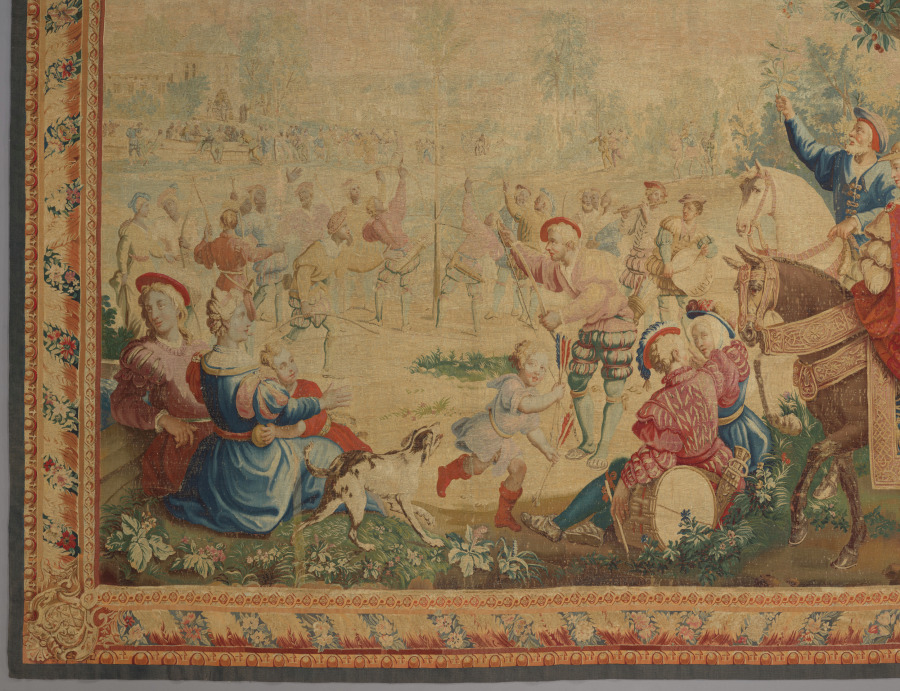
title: Month of May: Scene of May Day Festival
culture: France, 18th century, Period of Louis XV (1723-1774)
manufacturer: Gobelins Manufactory (France, Paris, est. 1662)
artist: Michel Audran (French, 1701–1771)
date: 1723–1774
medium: tapestry weave: linen warp, wool and silk wefts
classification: Tapestry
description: Seated spectators and splendidly clothed ladies and gentlemen on horseback watch May Day festivities in this tapestry. In the middle distance, archers prepare to shoot at a bush and bird placed atop a maypole, while more spectators congregate in the receding landscape. A border of rolled acanthus leaves and flower garlands frames the scene. This scene is one of twelve so-called Months of Lucas tapestries, each depicting activities that coincide with a month of the year. The original “Months of Lucas” was a sixteenth-century Flemish tapestry set that was owned by the French monarchy and mistakenly attributed to Lucas van Leyden during the 1600s. To this day, they continue to be known as the “Months of Lucas.” This original set was burned in 1797 so their gold and silver metal threads could be used to replenish the depleted French coffers. Beginning in the 1600s, the popular Months of Lucas were reproduced in several different versions under various masters at the Gobelins Manufactory in Paris, the famous royal production center for French tapestries since Louis XIV (1638–1715). The lower right hand corner of this tapestry bears the signature of Michel Audran (1701–1771), director of the Gobelins high-warp loom workshop from 1732–71, who produced this tapestry for a private patron in addition to the other royal commissions of the set.